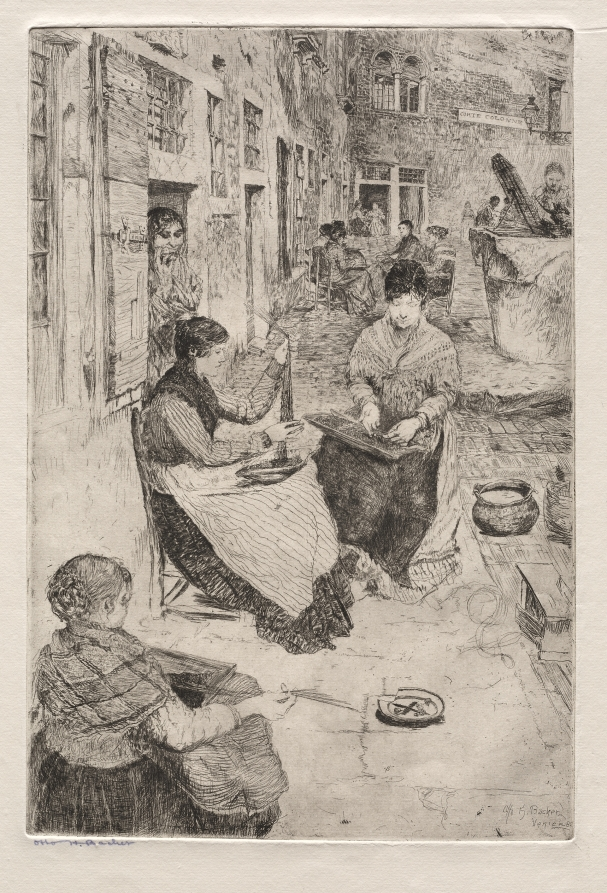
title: Etchings of Venice: Bead Stringers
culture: America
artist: Otto H. Bacher (American, 1856–1909)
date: 1882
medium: etching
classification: Print